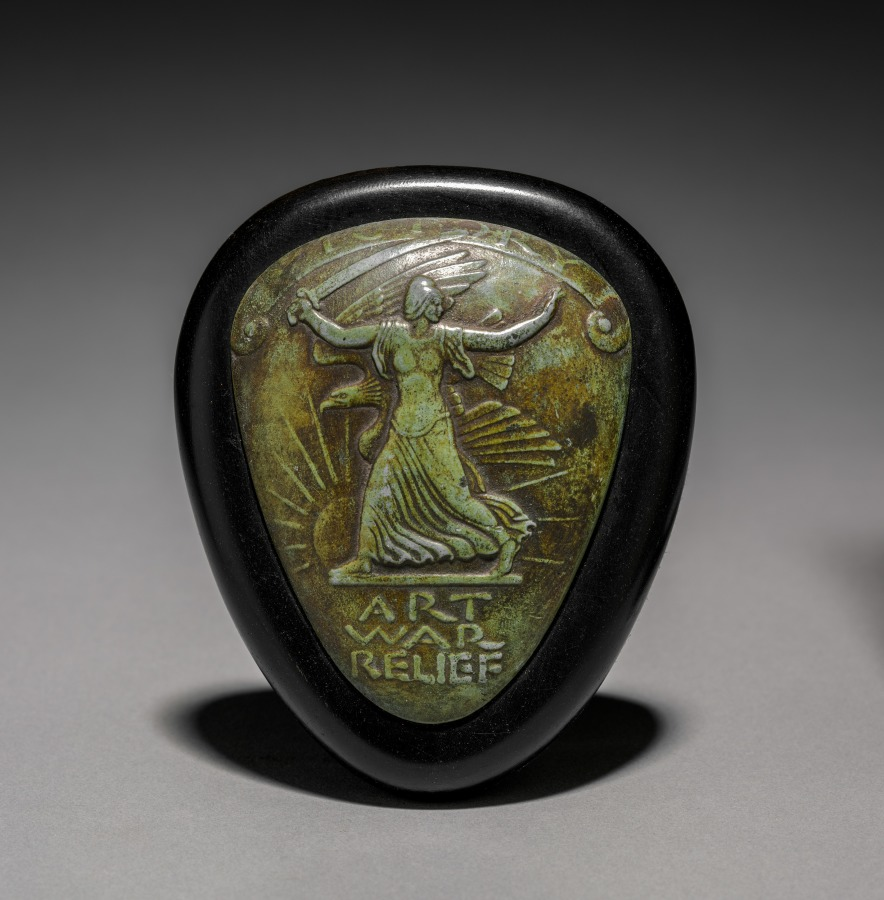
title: Victory Medallion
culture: America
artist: Paul Manship (American, 1885–1966)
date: 1918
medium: bronze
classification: Metalwork